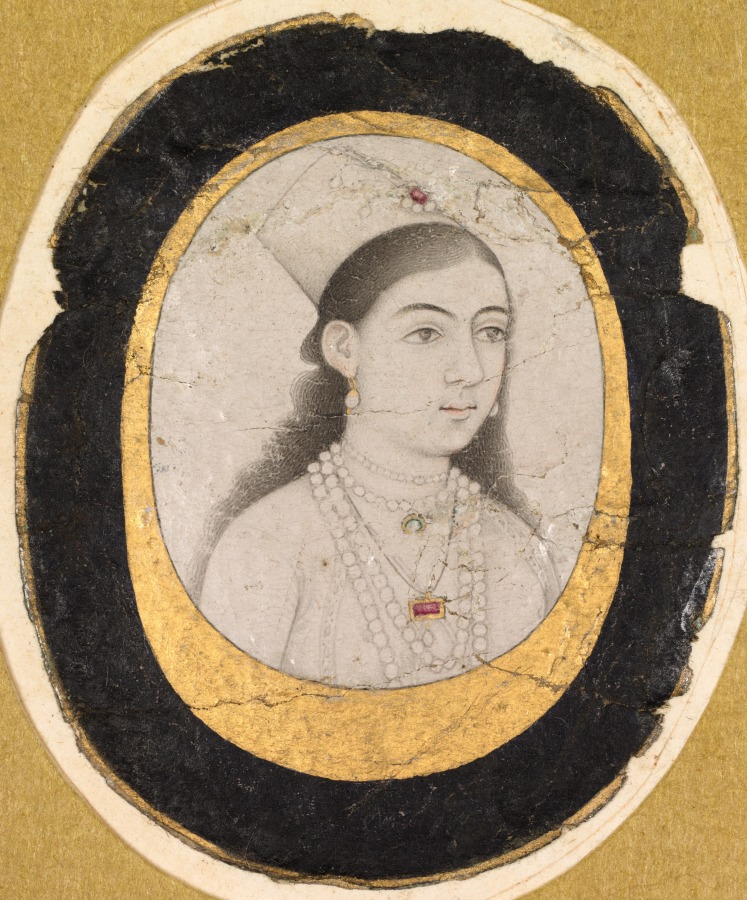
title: Jewel Portrait of a Young Girl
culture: India, Mughal, 17th century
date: c. 1660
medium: ink drawing with slight accents of color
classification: Painting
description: This small drawing of a young girl wearing a chaghtai cap may be a likeness of a member of a royal or courtly Mughal family. The accuracy of female portraiture is an unresolved issue in Mughal art, as there are many paintings of women that appear to be studies of female beauty rather than visual records of real people. However, because the girl in this painting is not an idealized type, it is more likely that this is a true portrait. Unlike jewel portraits of emperors that were intended to be worn in public as status symbols, this was more likely a private gift of sentimental value.